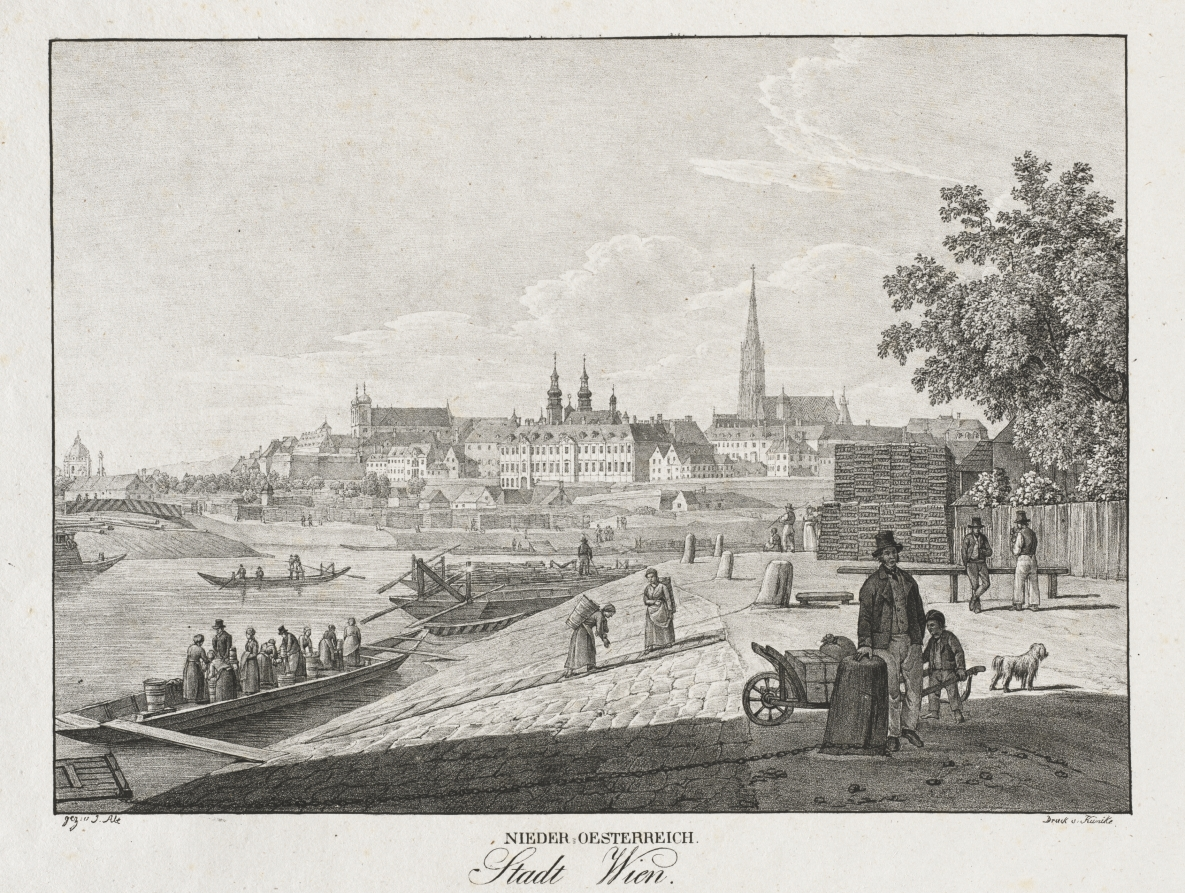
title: Nieder-oesterreich, Stadt Wien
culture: Austria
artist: Jakob Alt (Austrian, 1789–1872)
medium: lithograph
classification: Print